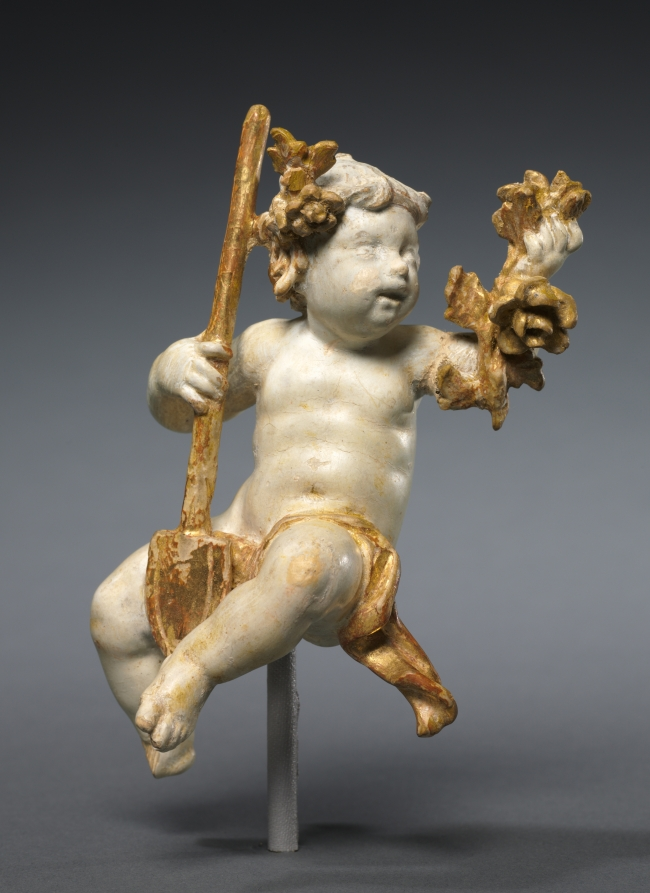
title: Putto as Spring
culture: Germany, 18th century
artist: Ferdinand Tietz (Austrian, 1708–1777)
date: c. 1765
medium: painted and gilded wood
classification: Sculpture